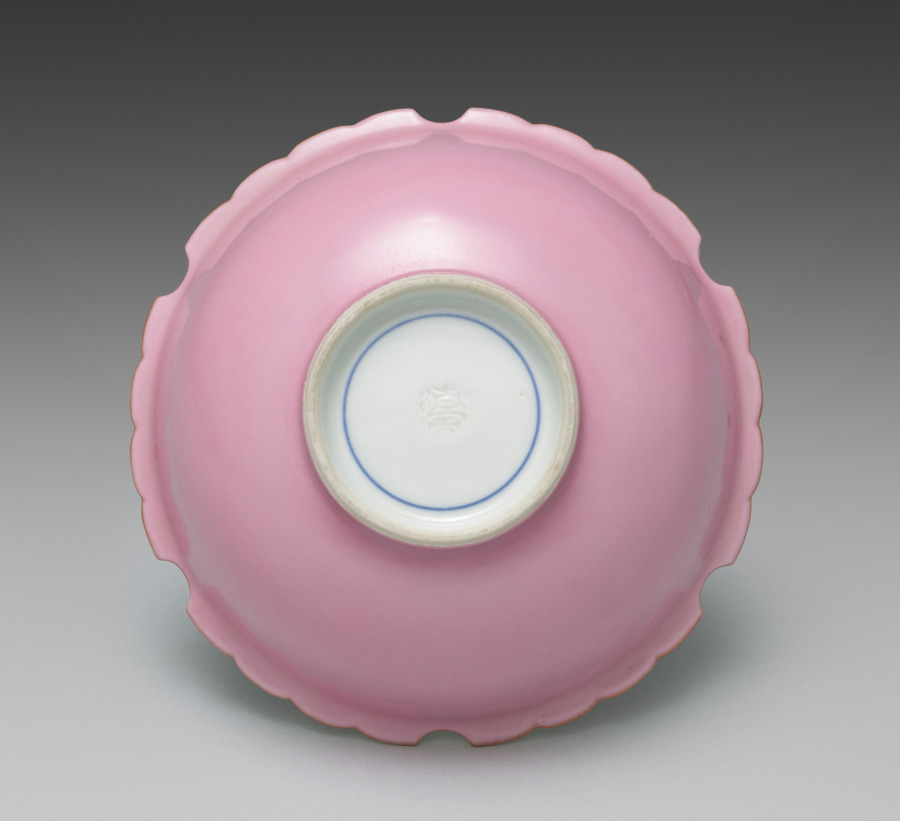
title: Dish from Snow-Flake Side Dishes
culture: Japan, Meiji period (1868–1912)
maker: Seifū Yohei III (Japanese, 1851–1914)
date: 1893–1914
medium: One from a set of six porcelain dishes; porcelain with lobed rims and pink glaze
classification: Ceramic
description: According to the box lid, this set of 6 side dishes, or mukōzuke, are “snow-flower style” (sekkashiki), having mouths shaped like snowflakes. Their mouths, which have 6 lobes and scalloped edges, are traced with brown iron oxide at the rim. The outside of each bowl is glazed with a very bright pink over the basin and foot, and the inside is left white. From directly above, one sees a snowflake-like shape, and from the side, they seem to float above a rosy ground.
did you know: The box for this set of dishes has an inscription on the side noting that they were for a person with the family name Nakamoto.